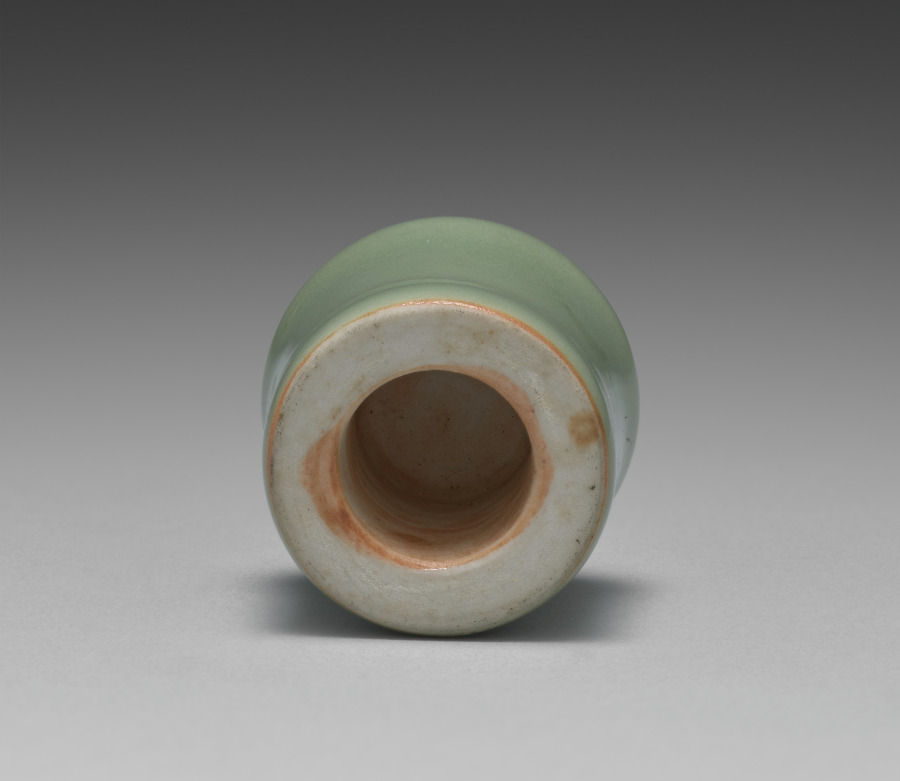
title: Roller End for Hanging Scroll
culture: Japan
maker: Seifū Yohei III (Japanese, 1851–1914)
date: 1893–1914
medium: One of a pair of hanging scroll roller ends; porcelain with celadon glaze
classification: Ceramic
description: Before entering into his apprenticeship with Yohei II, Seifū Yohei III trained as a painter in Osaka. He continued to paint throughout his career as a ceramist. As part of his ceramic practice, Yohei III also made roller ends to be placed at either end of the wooden dowel around which the lower part of a hanging scroll mounting is wrapped. These served both as weights for the painting and as knobs for handling it when rolling and unrolling. The pair here is made of porcelain with a green glaze.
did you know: This is one of two roller ends for the hanging scroll by Seifū Yohei III, Rain Clearing over a Summer’s Mountain, CMA 2022.151.